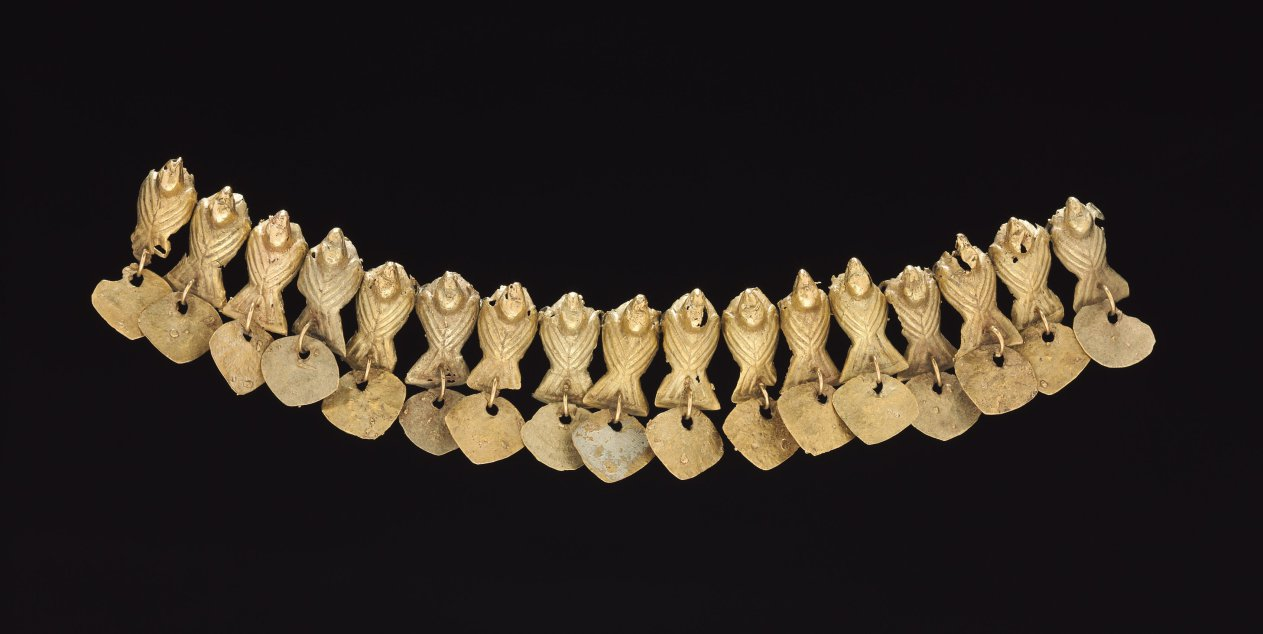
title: Bird Beads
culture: Colombia, Muisca style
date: c. 900–1550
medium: cast gold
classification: Jewelry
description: Muisca metalwork divides into two categories: ornaments to be worn, such as these, and offering figurines, in the case to the right. The elaborate bird pendant features delicate herringbone moldings, openwork patterns, and wing details-all part of the wax model from which the pendant was cast (see nearby computer animation). The dangles were attached after casting.